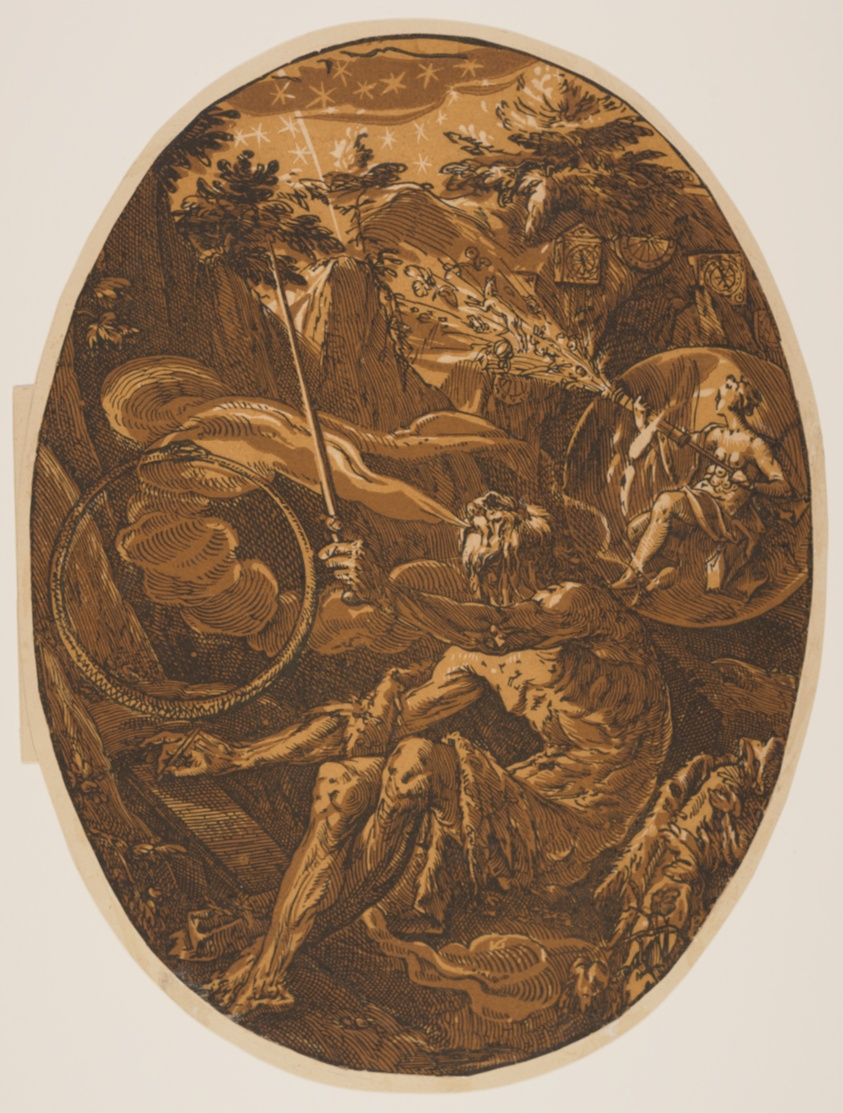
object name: Print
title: Demogorgon in the Cave of Eternity, from The Deities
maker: Hendrick Goltzius (Dutch, 1558–1617)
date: 1588/90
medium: Chiaroscuro woodcut from three blocks in orange-brown on ivory laid paper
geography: Netherlands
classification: print; paper; prints and drawing; woodcut